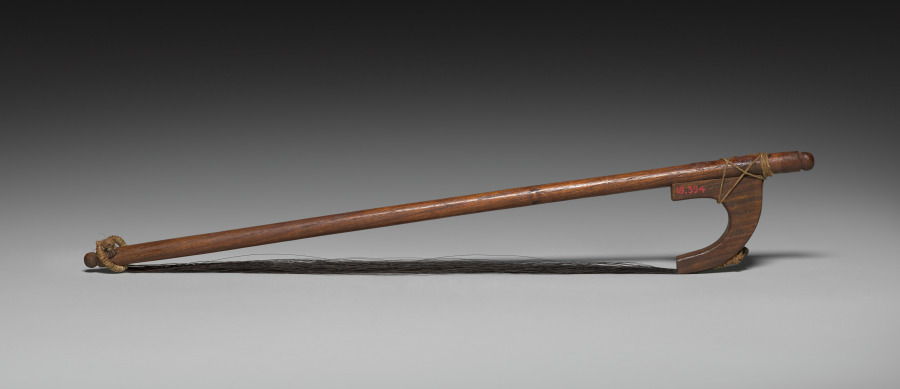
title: Bow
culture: India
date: 1800s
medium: Wood, horsehair, and jute fiber cord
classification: Musical Instrument